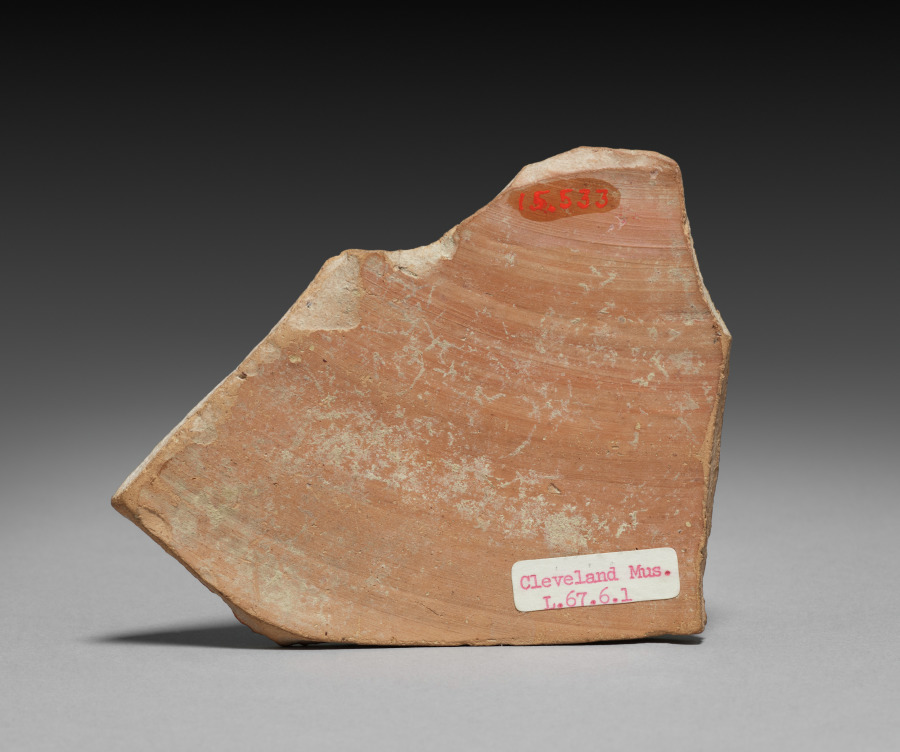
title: Fragment from Black-Figure Neck-Amphora of Panathenaic Shape (Storage Vessel): Apollo and Zeus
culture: Greek, Attic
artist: manner of Antimenes Painter (Greek, Attic, active c. 530–510 BCE)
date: c. 520 BCE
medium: ceramic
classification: Ceramic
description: Comparison with better-preserved vases—and with other artworks and monuments, such as the famous Siphnian Treasury at Delphi—helps to fill in some of the action no longer surviving from the rest of this vase, which once showed Apollo and Herakles struggling for the Delphic tripod. One claw-footed leg of the tripod survives, across the chest of Zeus, the bearded figure who intervened to stop the quarrel between two of his sons. Apollo is the unbearded figure at left, while Herakles would have appeared beyond the break on the right.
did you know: The claw-footed tripod leg before Zeus's chest identifies the scene—the struggle for the Delphic tripod.